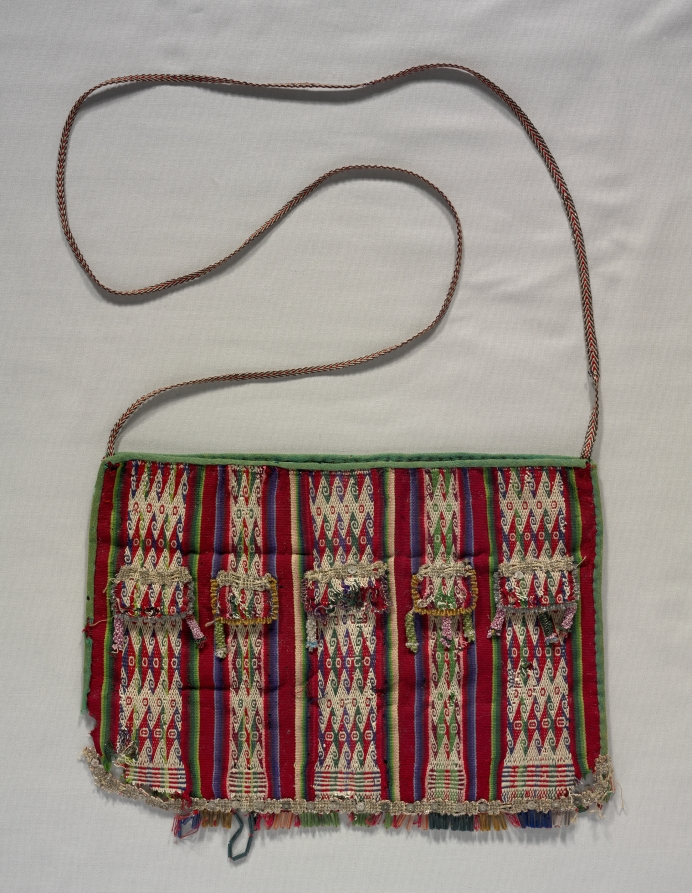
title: Pouch (Bolsa)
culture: Bolivia, Haurina, late 19th century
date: late 1800s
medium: wool with glass beads and sequins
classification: Textile